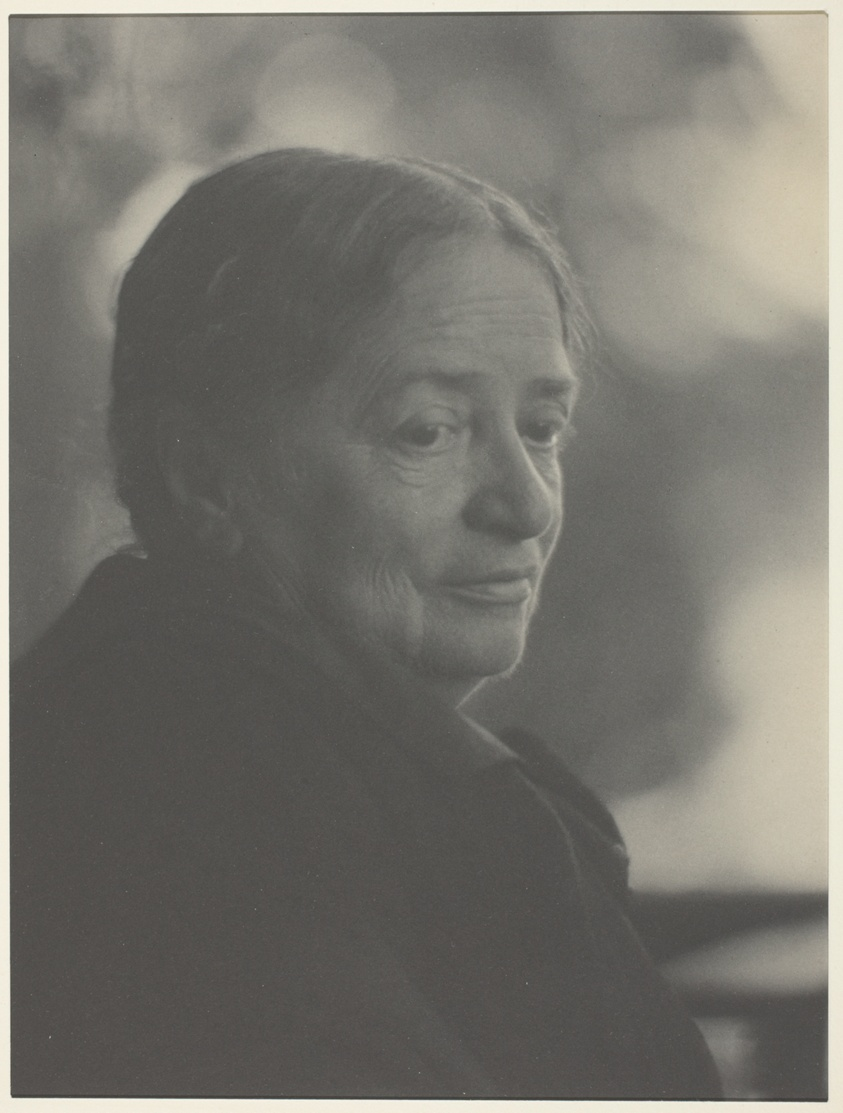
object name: Photograph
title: Ma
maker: Alfred Stieglitz (American, 1864–1946)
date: 1915/17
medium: Platinum print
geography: United States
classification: platinum print; photographic process; photography; photograph